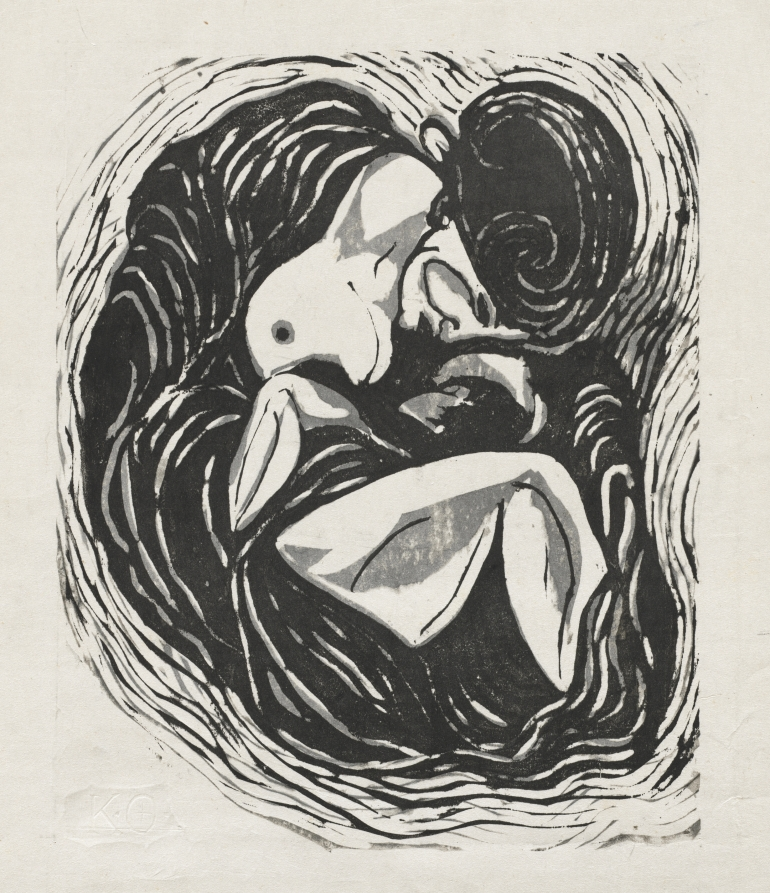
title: Mother and Child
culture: Japan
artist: Koshiro Onchi (Japanese, 1891–1955)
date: c. 1915–1955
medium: woodcut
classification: Print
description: Kōshirō Onchi was a key figure in the sōsaku-hanga movement. He not only provided essential aesthetic and spiritual leadership, but his aristocratic background made him a forceful advocate of printmaking within the hostile bureaucracy of Japan's hierarchical art world. Onchi admired the nonobjective images of Russian artist Wassily Kandinsky and the Expressionist style of the Norwegian artist Edvard Munch, whose works shared a kinship with his own interests in the expressive power of nonrepresentational and abstracted figural compositions as well as color. Onchi was particularly attracted to the medium of woodcut in which he felt he was forced to simplify his forms and thus intensify the expression of his emotion while cutting, gouging, and scraping the image into the block.